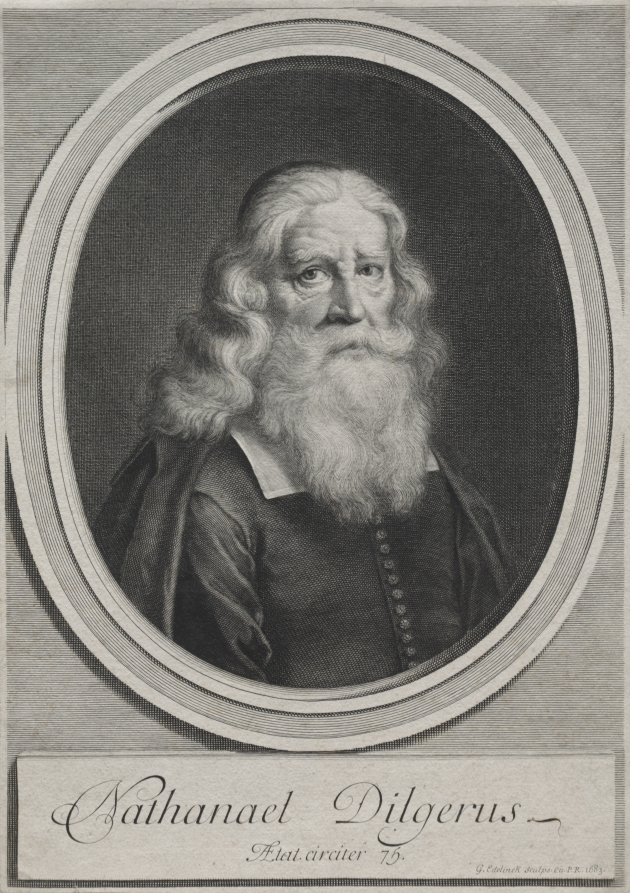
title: Nathanael Dilgerus, Minister of Danzig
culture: France, 17th century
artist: Gerard Edelinck (French, 1640–1707)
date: 1683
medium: engraving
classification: Print